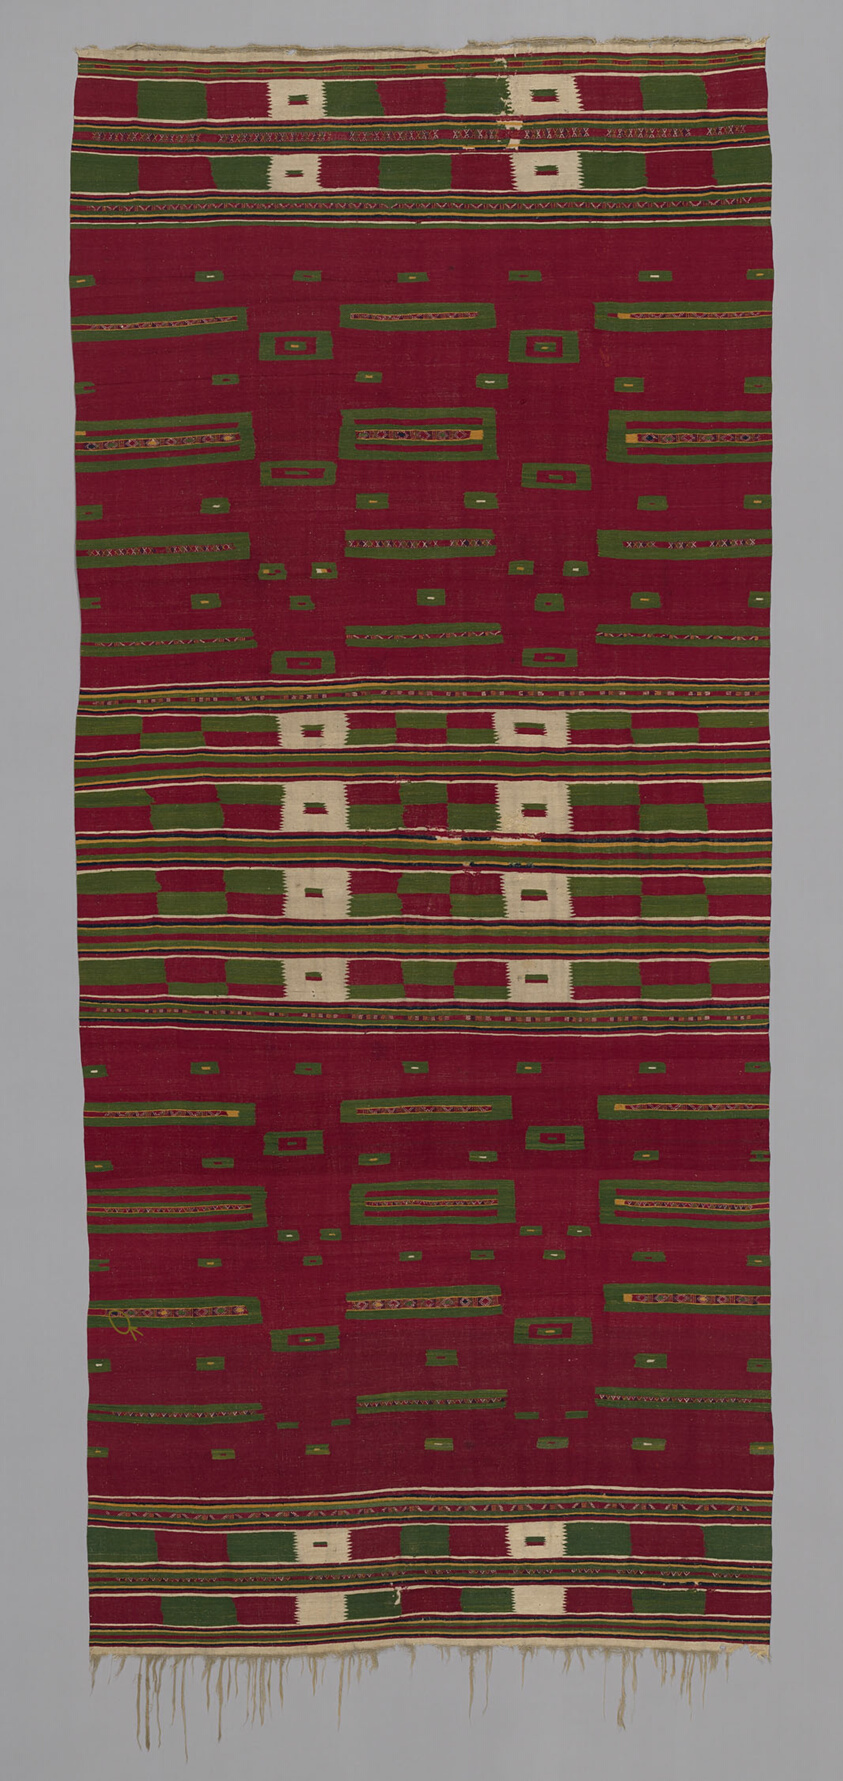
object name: Coverings and Hangings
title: Tent Hanging or Coverlet (Djerbi)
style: Arts of Africa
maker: Possibly Laghouat, Algeria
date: Mid–/late 19th century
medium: Wool, stripes of weft-faced plain weave and stripes of slit and double interlocking tapestry weave, main warp fringe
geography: Algeria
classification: weaving; arts of Africa; textile; coverlet